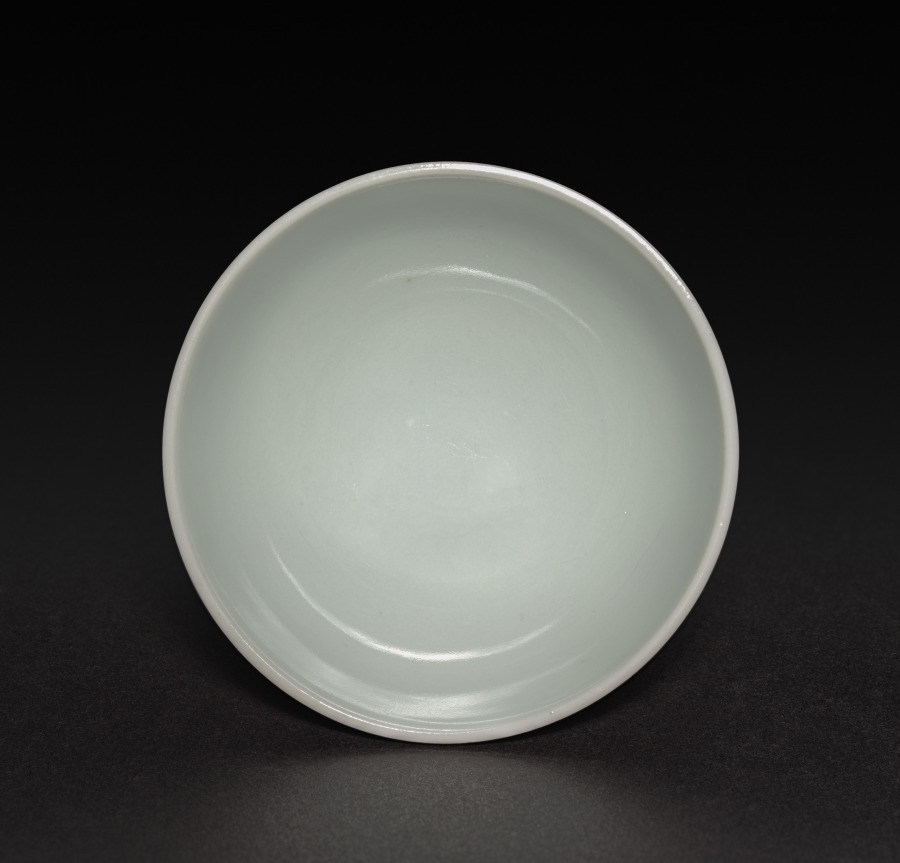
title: Cup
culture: China, Jiangxi province, Jingdezhen kilns, Qing dynasty (1644-1911)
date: 1700s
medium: porcelain with mottled blue glaze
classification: Ceramic